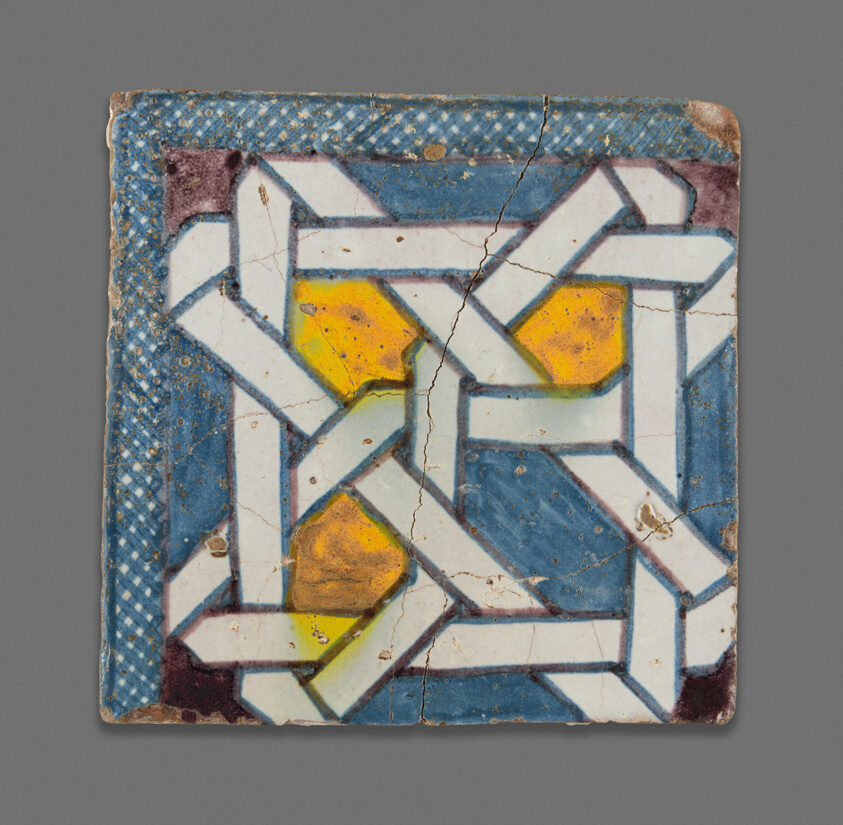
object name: Architectural fragment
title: Square Tile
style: Islamic (culture or style)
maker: Morocco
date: Late 19th century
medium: Buff pottery with polychrome painting over white glaze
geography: Morocco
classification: earthenware; asian art; ceramics; decorative arts